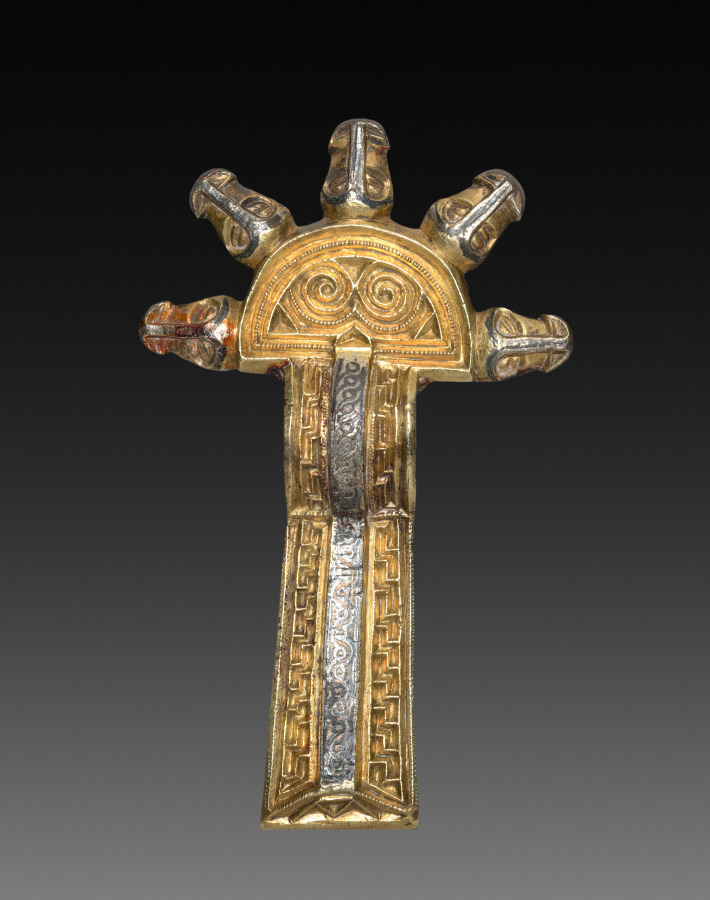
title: Fibulae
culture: Alemannic, Migration Period, 6th-7th century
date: 500s-600s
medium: cast silver, parcel-gilt, with niello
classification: Jewelry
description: A woman of high rank might have worn these twin fibulae on her shoulders, one fastening her inner garment on the right, the other her outer garment on the left. She might also have suspended them from her belt as decorative ornaments.